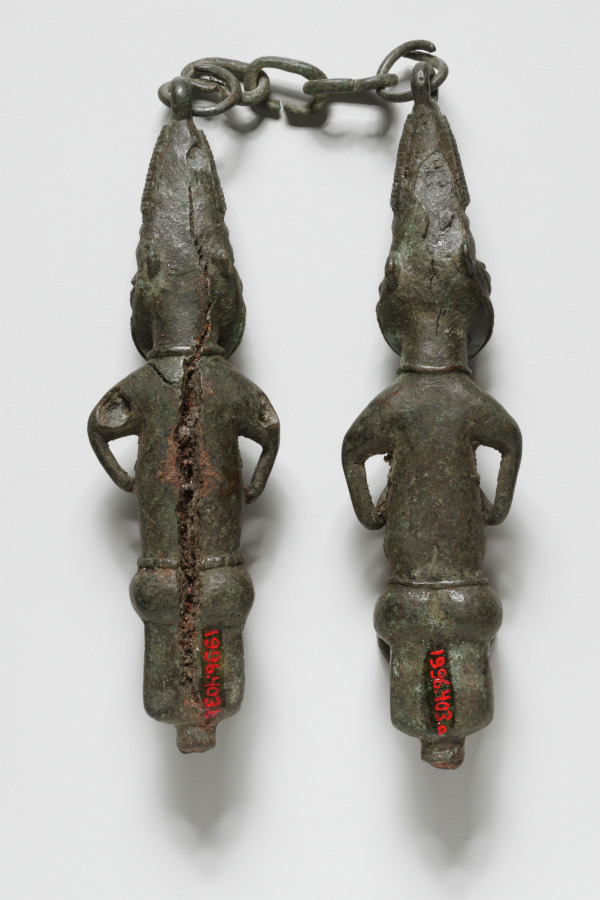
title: Pair of Ritual Staffs (ẹdan Ògbóni)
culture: Africa, West Africa, Nigeria, Yorùbá-style maker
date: possibly 1800s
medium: Copper alloy and iron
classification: Sculpture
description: The chain connecting these two figures allows them to be worn in public by a member of the Ògbóni or Òṣùgbó association as authority emblems. The male on the right gives the association’s typical salute by clasping his left fist on the right one, while the female on the left holds her breasts as a sign of welcome and generosity. The use of copper alloy and iron expresses Ògbóni/Òṣùgbó's concerns with longevity and durability.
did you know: Imagine how this would look when its owner wore it; the chain would go around the back of the neck and the figures would rest on their chest.